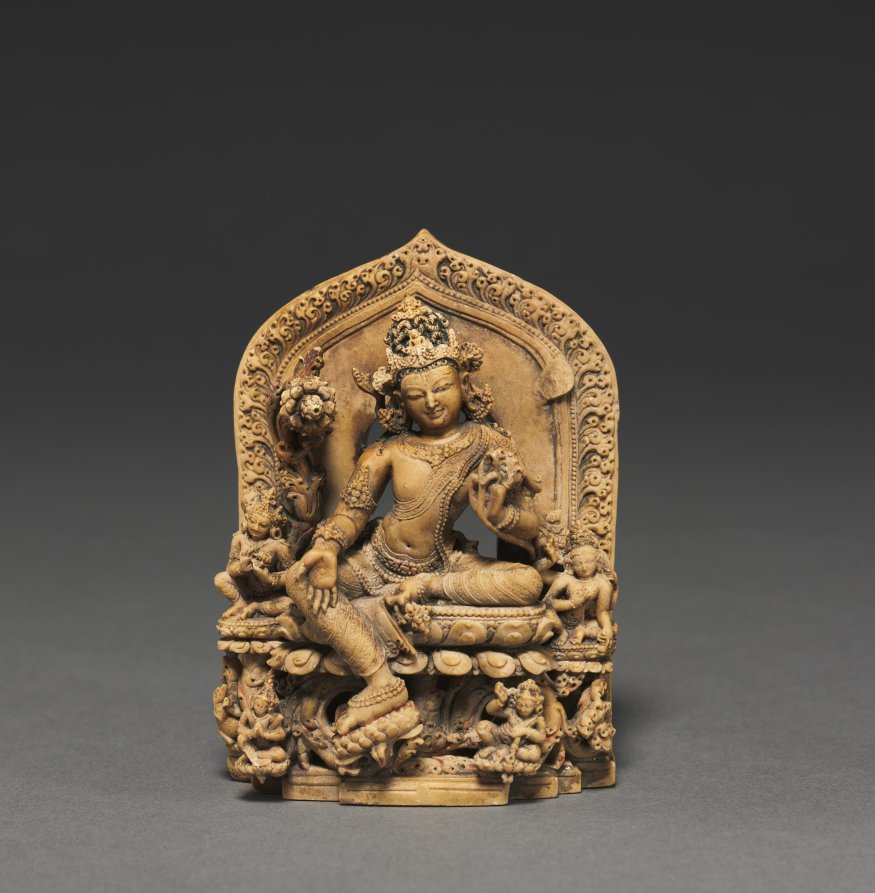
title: Bodhisattva of Compassion as Lokeshvara the Sky Flyer (Khasarpana)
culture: Eastern India, Bihar, Pala dynasty, reign of Ramapala (reign 1078/79–at least 1130)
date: late 1000s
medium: Kaolin with traces of pigment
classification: Sculpture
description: Exquisite Buddhist votive sculptures carved from soft ivorylike stone were made for personal devotional use during the 11th and 12th centuries in particular. This form of Avalokiteshvara, the powerful bodhisattva of compassion, sits with one foot down in the posture of royal ease, the Buddha Amitabha in his crown. This special form of the bodhisattva of compassion brings relief to hungry ghosts. A hungry ghost with a distended belly praises him in the lower left corner of this plaque, to the left of the tiny regal figure with a manuscript tucked in his left arm. Green Tara is at Avalokiteshvara's proper right, holding a lotus, and the four-armed goddess Bhrikuti holds a rosary and water bottle at his left.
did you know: When colored, Lokeshvara was white, Tara at his right knee was green, and Bhrikuti at his left knee was gold.